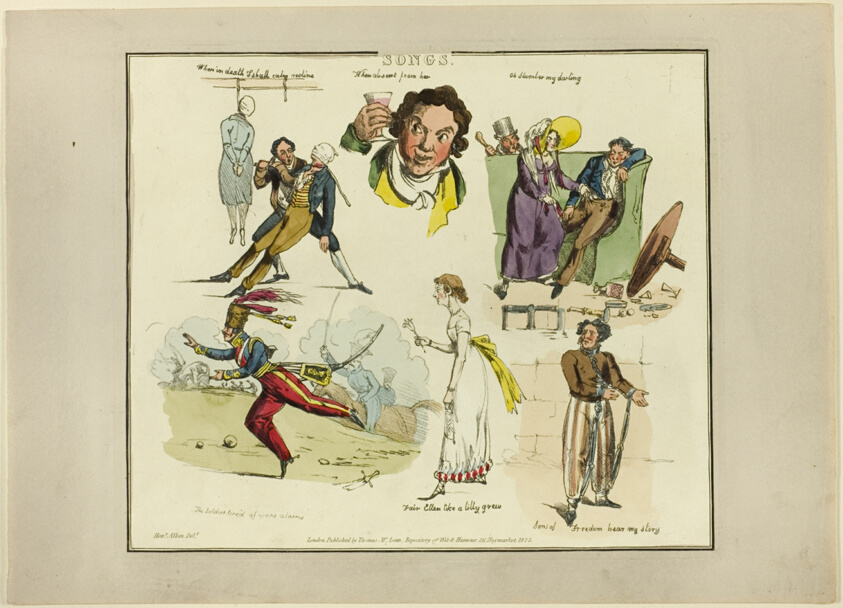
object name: Print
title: Plate from Illustrations to Popular Songs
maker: Henry Alken (English, 1785-1851); published by Thomas McLean (English, active 1790-1860)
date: 1822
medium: Soft ground etching with hand-coloring and aquatint on paper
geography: England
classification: etching; print; prints and drawing